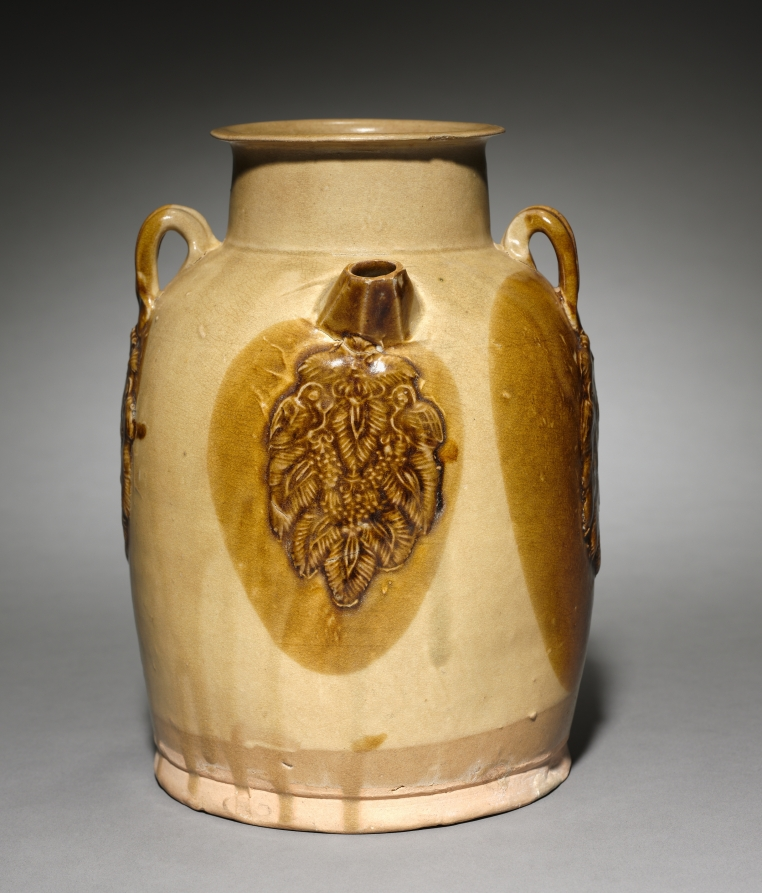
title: Ewer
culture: China, Hunan province, Tongguan, Tang dynasty (618–907)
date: 800s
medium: glazed stoneware with molded and applied decoration, Changsha ware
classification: Ceramic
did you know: Molded clay medallions with a stylized double-bird-and-leaf pattern were applied below the two side loops and the spout.